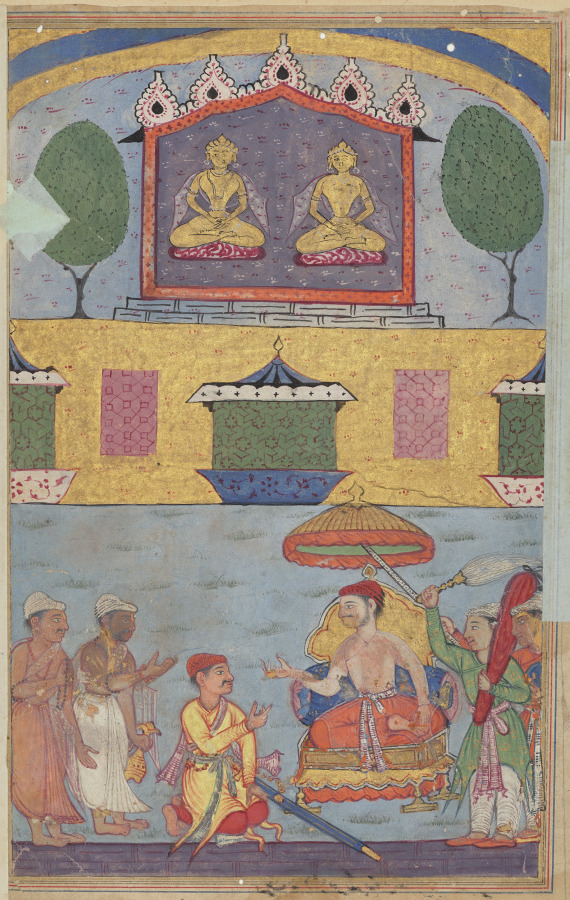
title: The goldsmith and the carpenter inform the king of a dream in which the golden images plan to desert the city for lack of worshippers, from a Tuti-nama (Tales of a Parrot): Third Night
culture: Mughal India, court of Akbar (reigned 1556–1605)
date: c. 1560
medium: gum tempera, ink, and gold on paper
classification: Painting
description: In this story, a goldsmith and a carpenter plan to steal a city’s idols by convincing the king that they have left on their own. They appear before the king, who addresses them from beneath a parasol in the lower register. The two golden idols sit in a shrine in the upper register.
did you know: The dark-skinned figure on the left was originally painted in a peach toned complexion that is still visible on his torso.